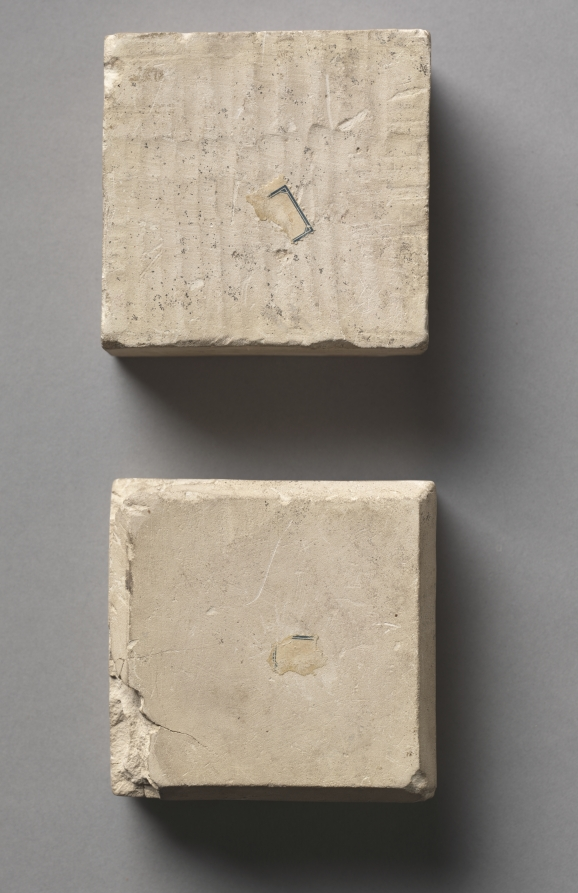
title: Mold in Two Parts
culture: Egypt, Greco-Roman period (332 BCE–395 CE), Ptolemaic dynasty (305–30 BCE) or later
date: 305–30 BCE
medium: limestone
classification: Sculpture